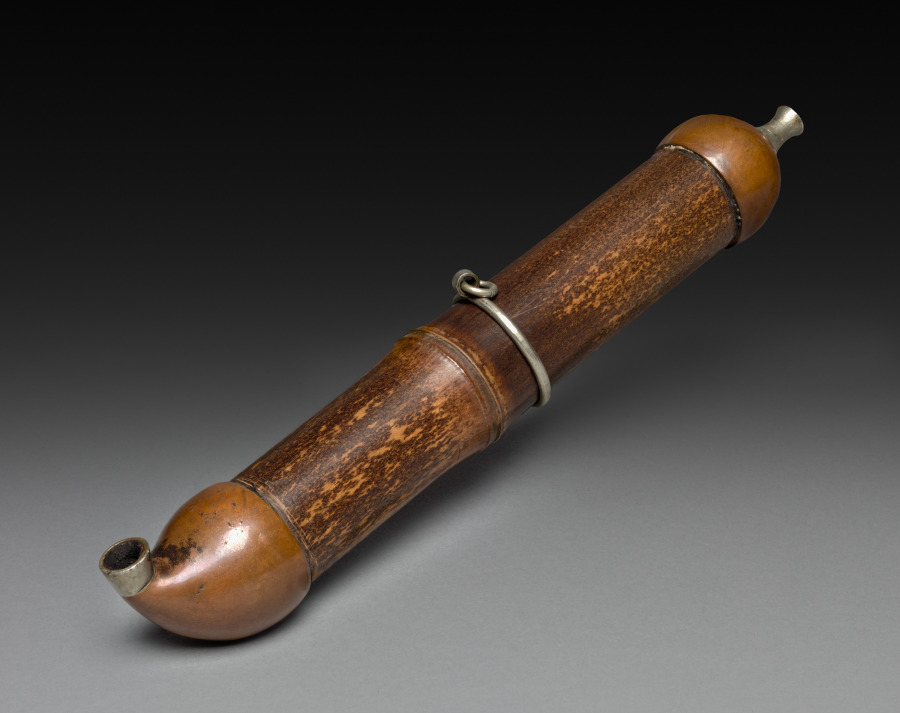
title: Tobacco Pipe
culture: Japan, Edo period (1615–1868)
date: 1700s to mid-1800s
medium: bamboo and metal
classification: Miscellaneous